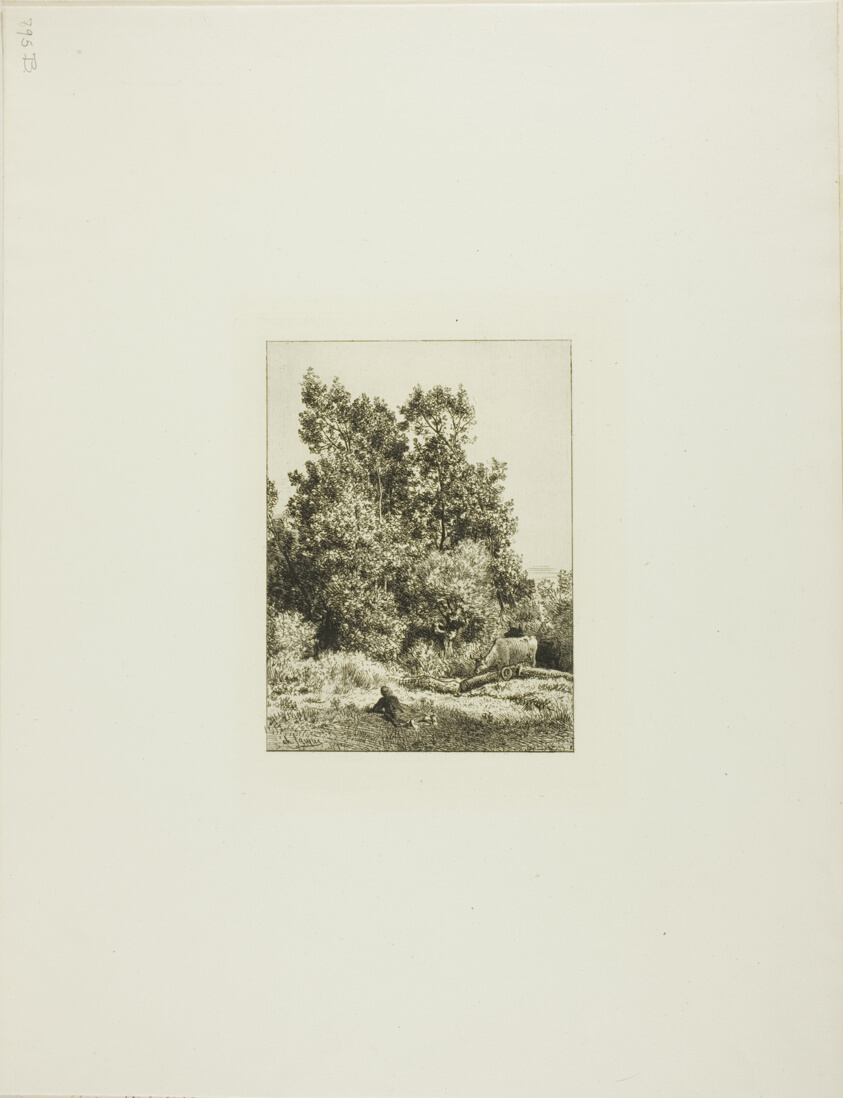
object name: Print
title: Landscape with Cowherd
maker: Charles Émile Jacque (French, 1813-1894)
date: c. 1865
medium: Etching on ivory laid paper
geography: France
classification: etching; print; prints and drawing